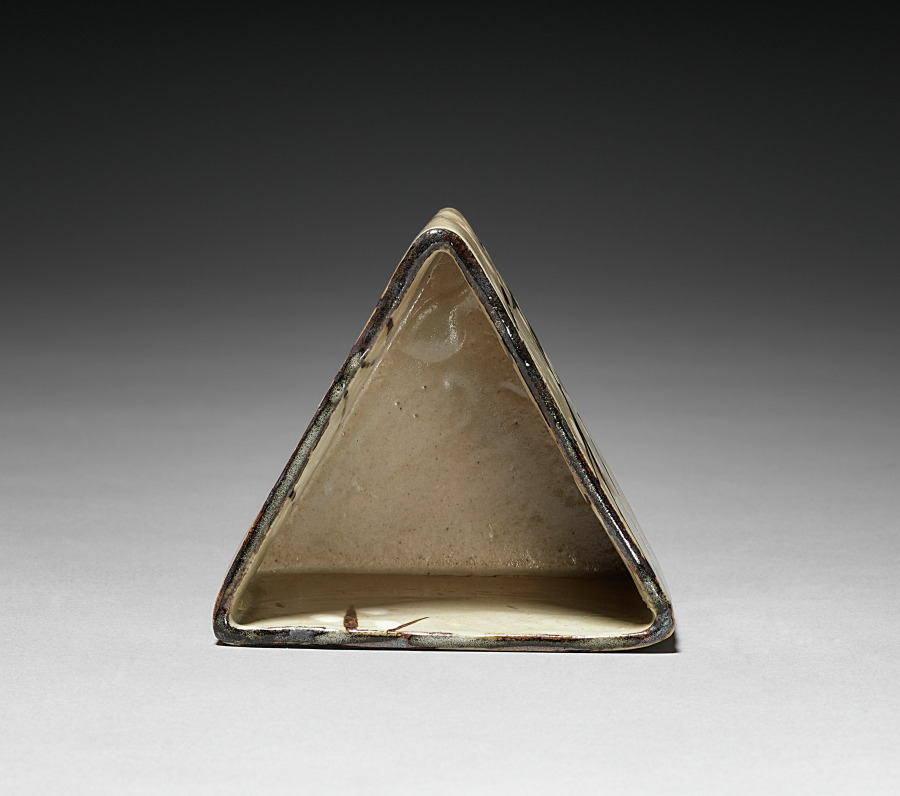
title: One of Five Serving Bowls (Mukozuke) with Prunus Design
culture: Japan, Edo period (1615–1868)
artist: school of Ogata Kenzan (Japanese, 1663–1743)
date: 1700s to mid-1800s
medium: Kyoto Ware: stoneware with underglaze iron oxide and slip decoration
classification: Ceramic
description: Note the rough, tan, clay bodies of these bowls with their deliberate irregularities. The design of branches was first painted in a black iron oxide, then the blossoms and buds in a white slip, followed by the application of a very thin transparent overglaze.